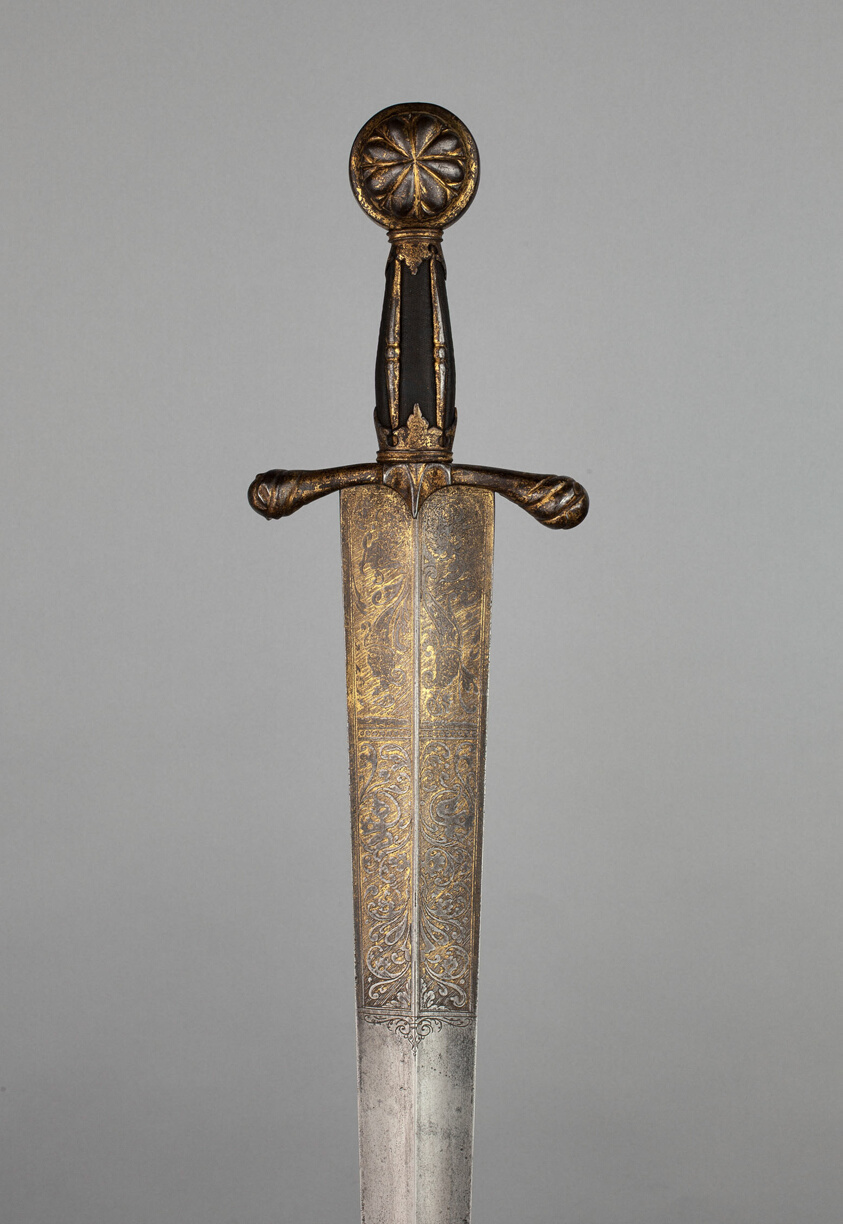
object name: Arms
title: Sword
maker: Northern Italian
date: c. 1500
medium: Steel, iron, gilding, wood, and textile (silk velvet)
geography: Northern Italy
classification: edged weapon-sword; arms; arms and armor